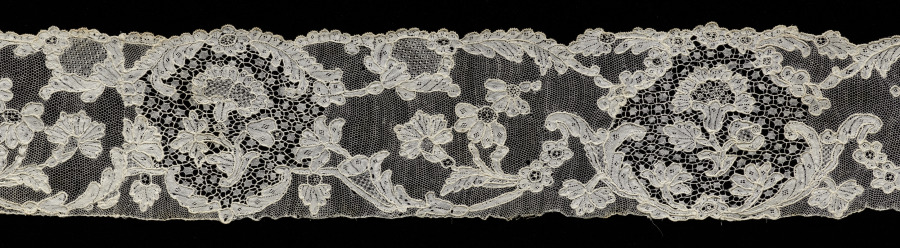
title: Lace Edging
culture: France, Alençon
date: 1700s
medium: Linen: needle lace (Point d'Alençon)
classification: Lace